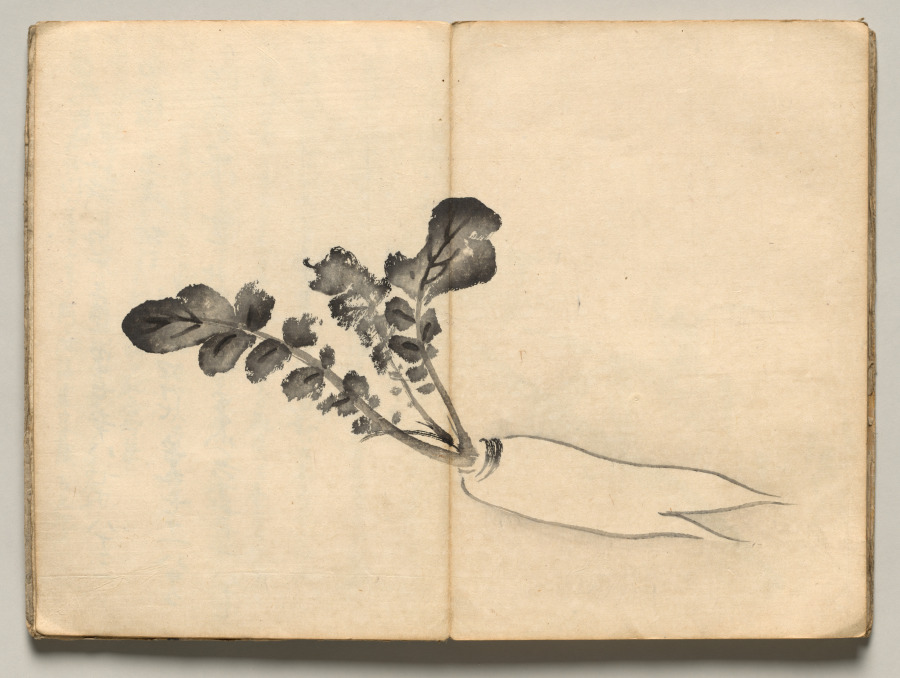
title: Radish from Ōkyo Picture Book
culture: Japan, Edo period (1615–1868)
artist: after Maruyama Ōkyo (Japanese, 1733–1795)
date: 1850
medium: accordion-style woodblock printed folding-book; ink and color on paper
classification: Bound Volume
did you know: This impression of a book of woodblock-printed designs is missing a spread that depicts a crane.